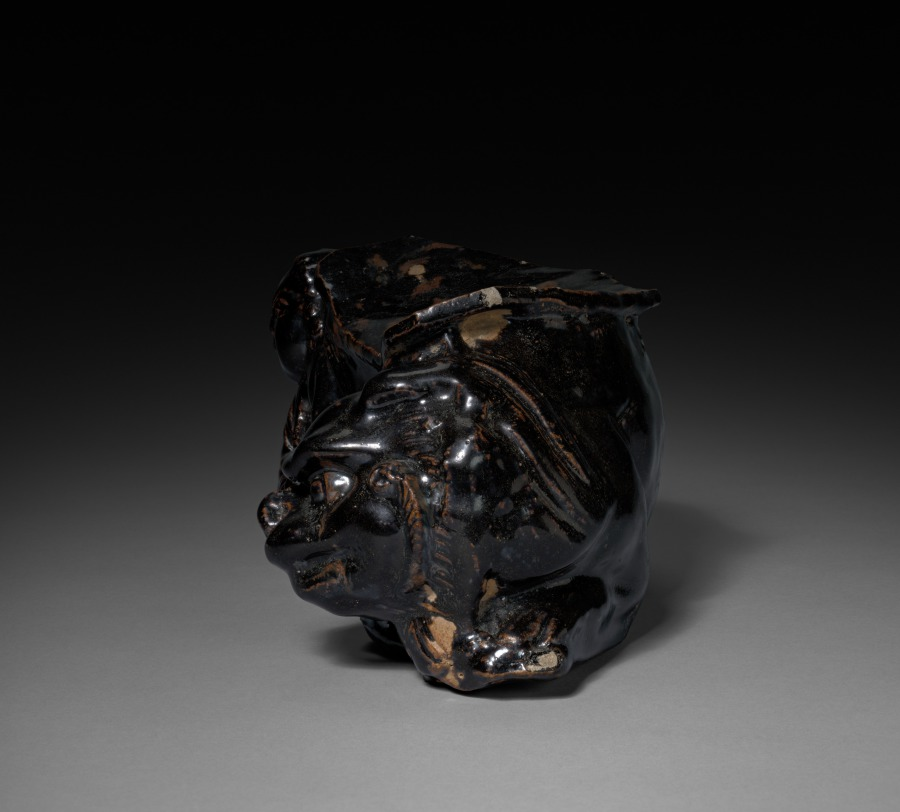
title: Pillow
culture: China, Yuan dynasty (1271-1368)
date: 1100s-1200s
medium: Glazed stoneware, Cizhou ware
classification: Ceramic